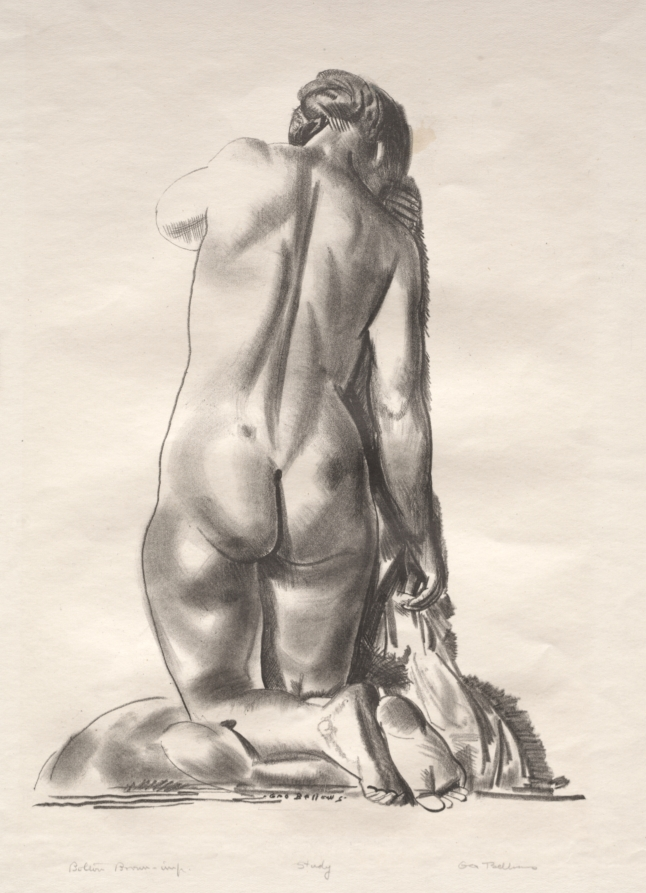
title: Nude Study, Woman Kneeling on a Pillow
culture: America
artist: George Bellows (American, 1882–1925)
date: 1924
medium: lithograph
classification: Print